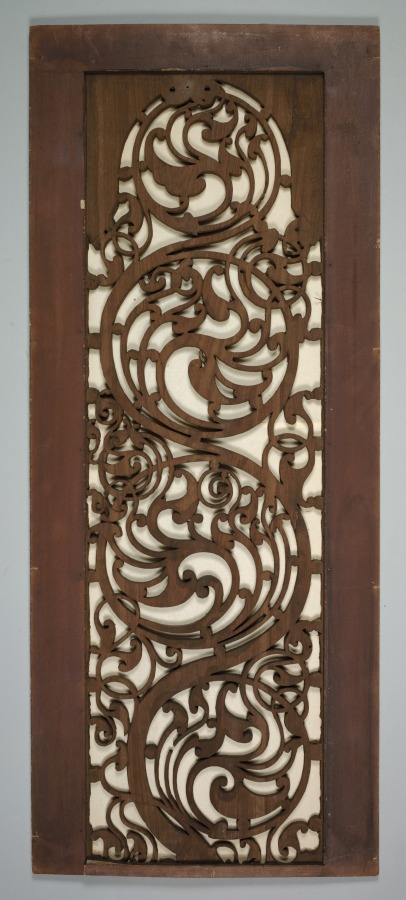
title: Carved Wood Panel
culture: India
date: c. 1875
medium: wood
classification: Wood